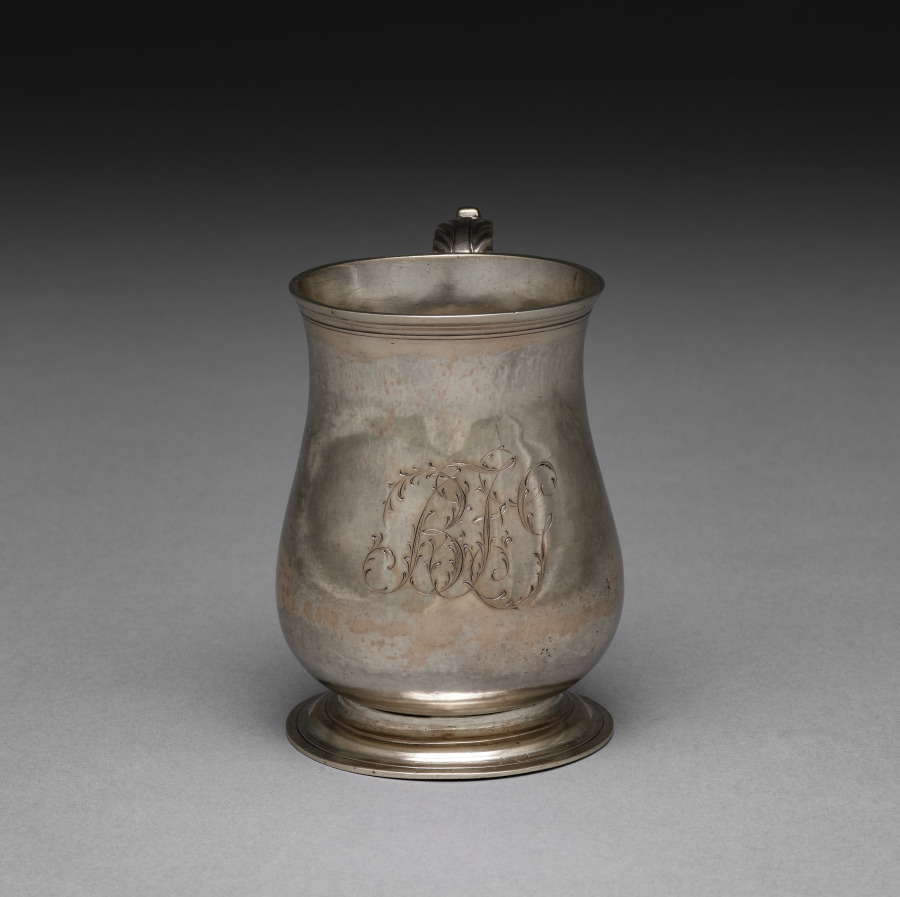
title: Cann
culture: America, Massachusetts, Boston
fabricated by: Zachariah Brigden (American, 1734–1787)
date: c. 1778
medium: silver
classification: Silver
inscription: Engraved on cann opposite handle: "BFG"; engraved underside: "1778"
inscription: Stamped underside: "Z. Brigden"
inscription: Scratched underside: "13-0,9"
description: "Cann" is an old term for a drinking cup with a handle.